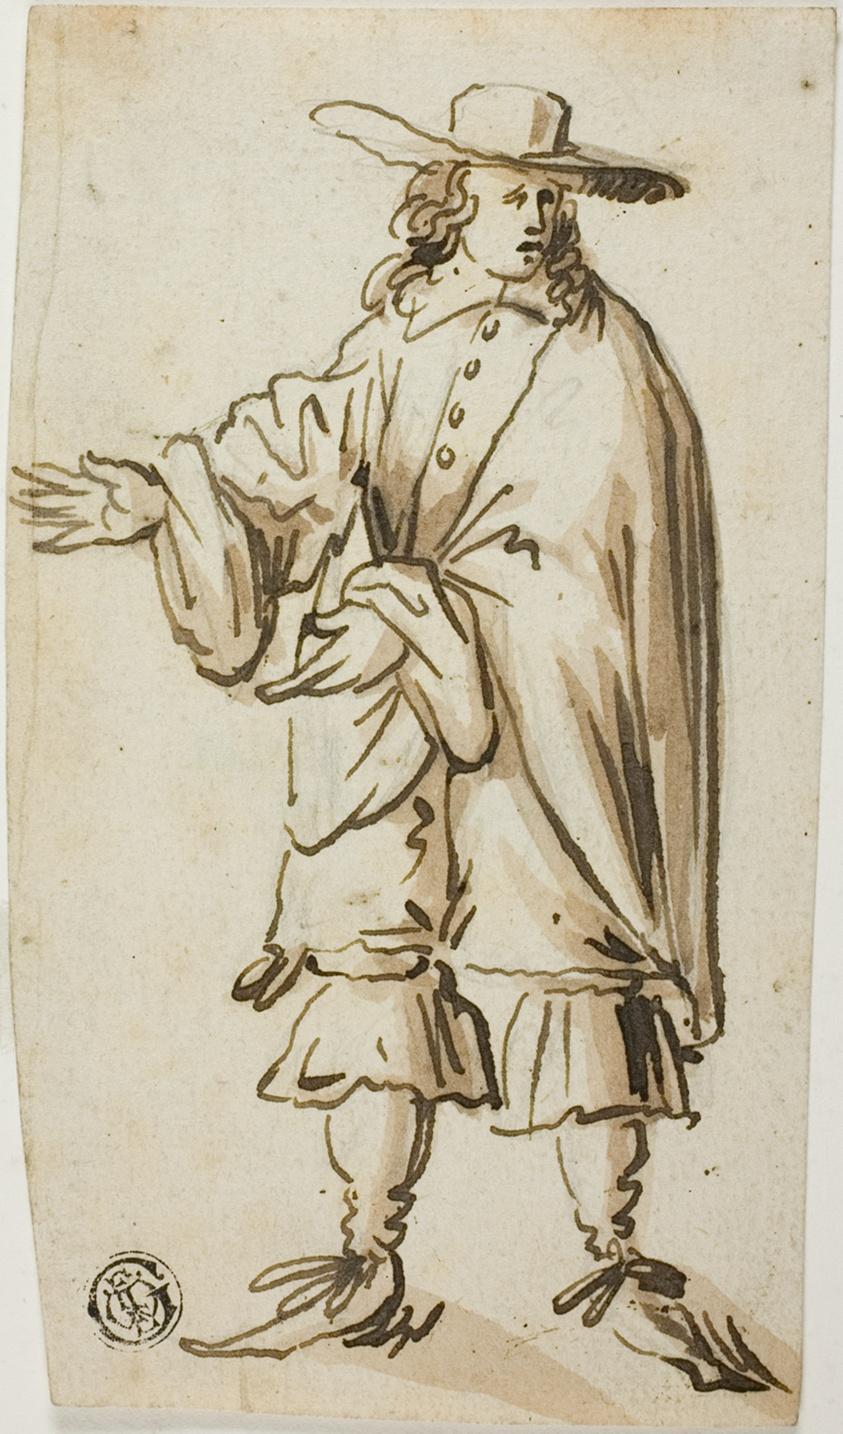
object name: Drawing and Watercolor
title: Standing Man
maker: Possibly Romeyn de Hooghe; Dutch, 1645-1708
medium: Pen and brown ink, with brush and brown wash, over traces of graphite, on ivory laid paper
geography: Holland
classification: pen and ink drawings; drawings (visual works); prints and drawing